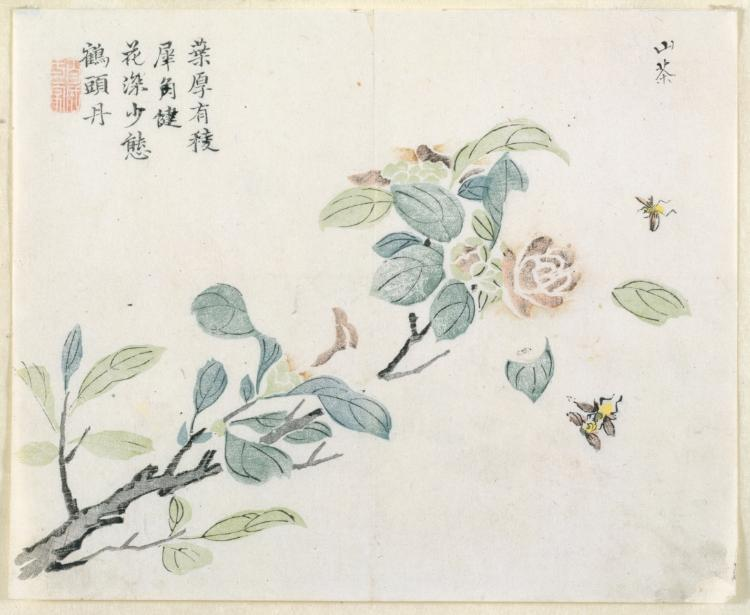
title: Flowering Branch with Bees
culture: China, Qing dynasty (1644-1911)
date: 18th Century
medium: color woodblock print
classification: Print